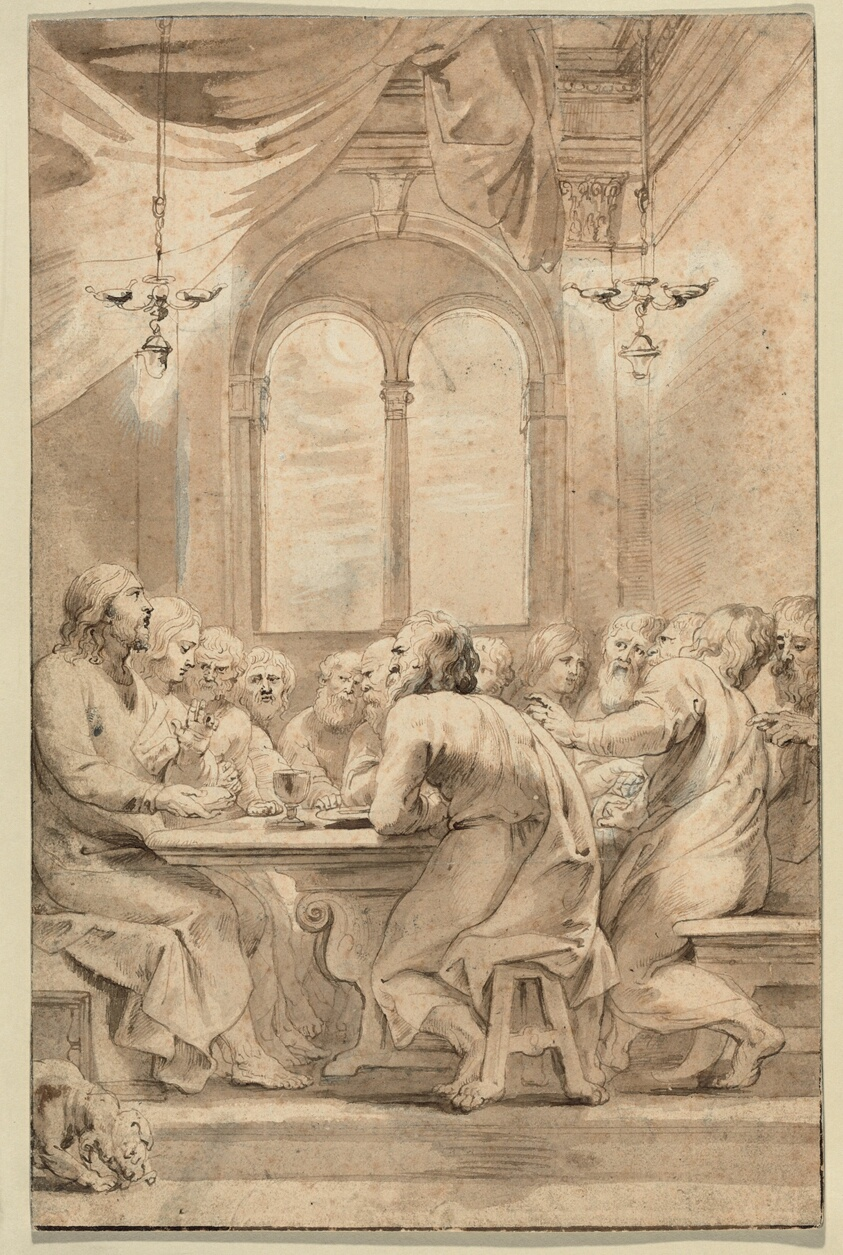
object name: Drawing and Watercolor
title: The Last Supper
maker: Peter Paul Rubens (Flemish, 1577–1640)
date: late 1613 or early 1614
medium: Pen and brown ink, with brush and brown wash, heightened with touches of white opaque watercolor, over traces of black chalk, on cream laid paper, incised for transfer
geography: Flanders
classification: drawings (visual works); paper; brush and wash; pen and ink drawings; prints and drawing